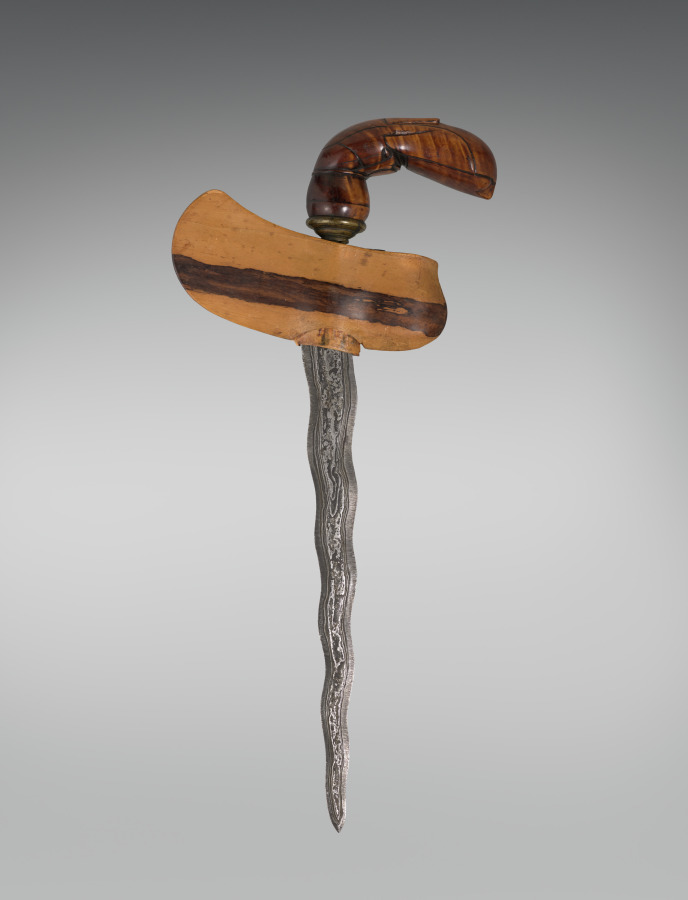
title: Sword (Kris)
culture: Java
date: 1800s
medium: iron with wooden handle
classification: Arms and Armor